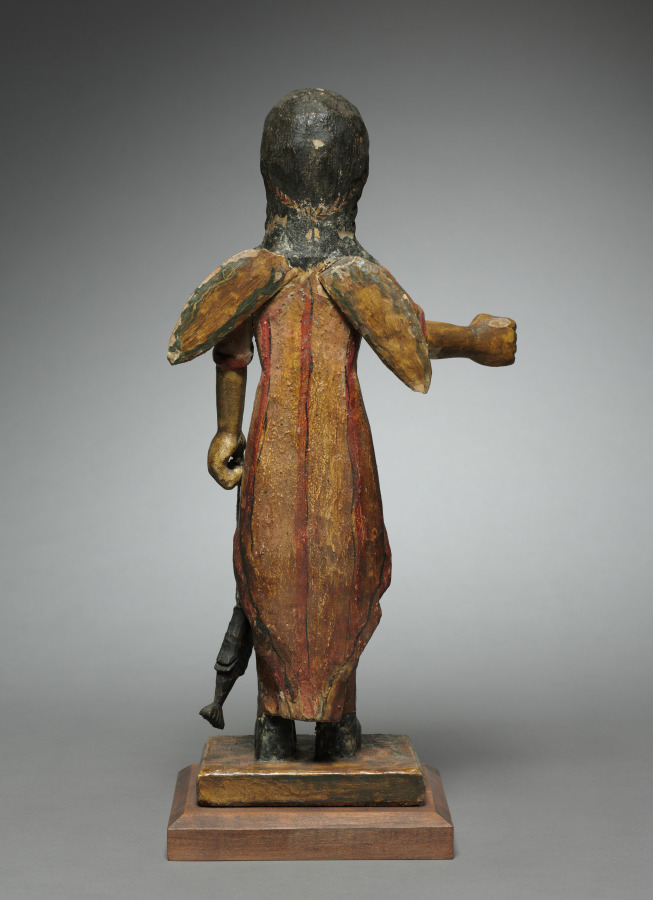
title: San Rafael - Archangel: santo de bulto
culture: America, New Mexico, 17th-18th century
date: 1600s-1700s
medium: painted wood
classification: Sculpture